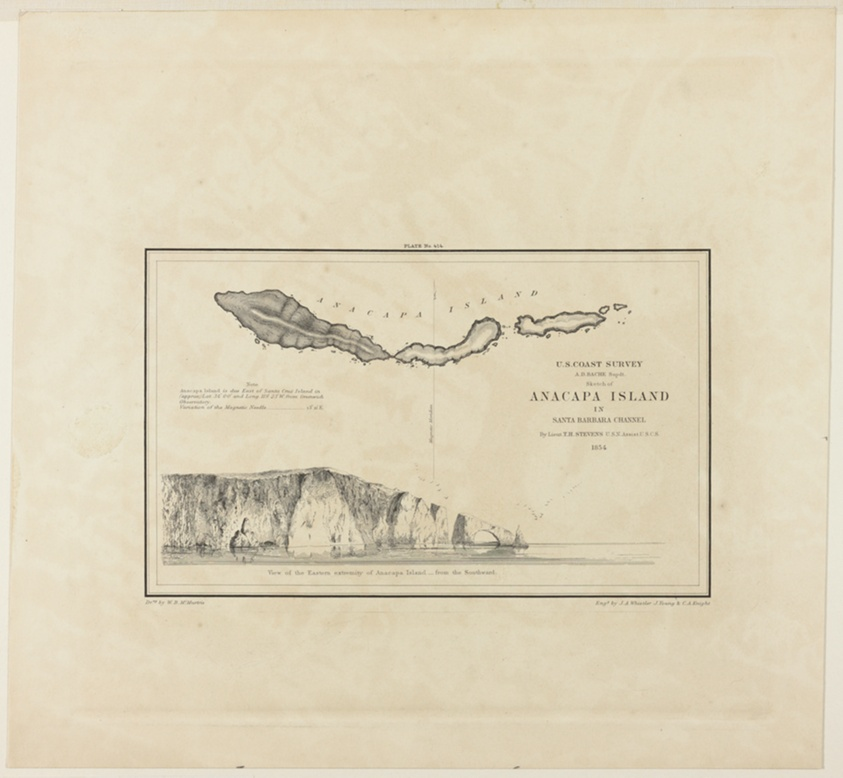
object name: Print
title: Anacapa Island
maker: James McNeill Whistler (American, 1834-1903)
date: 1854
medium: Etching in black ink on cream wove paper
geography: United States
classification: etching; print; prints and drawing; paper